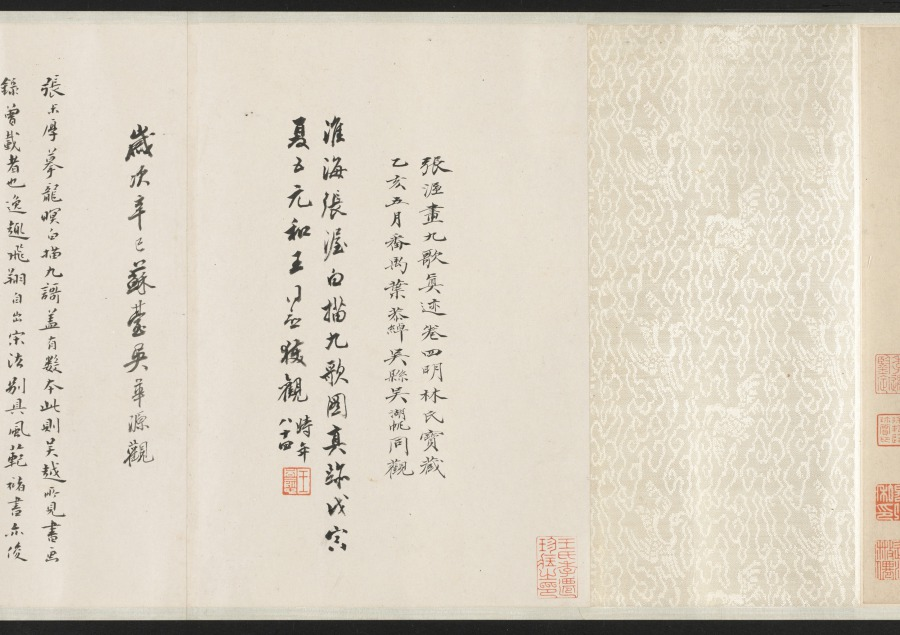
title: Nine Songs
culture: China, Yuan dynasty (1271-1368)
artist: Zhang Wo (Chinese, active c.1336–after 1364)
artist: Chu Huan (Chinese, active 1361)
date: 1361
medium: handscroll; ink on paper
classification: Painting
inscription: 7 colophons and 47 seals: 1 colophon, dated 1361, and 28 seals of Chu Huan 褚奐 (active c. 1361); 1 colophon, dated 1785, and 1 seal of Lu Shihua 陸時化 (1714-1779); 2 seals of Lu Yü-ch'ing (18th c.); 1 colophon, dated 1935, of Ye Gongchuo 葉恭綽 (1881-1968); 1 colophon, dated 1935, of Wu Hufan 吳湖帆(1894–1968); 1 colophon, dated 1938, and 1 seal of Wang Tongyu 王同愈 (1856-1941); 1 colophon, dated 1941, of Wu Huayuan 吳華源 (1893-1972); 1 colophon, dated 1942, and 9 seals of Xu Bangda 徐邦達 (1911–2012); 1 colophon, dated 1942, of Lang Jingshan 郎靜山 (1892-1995); 1 colophon, dated 1944, of Tang Yun 唐雲 (1910-1993); 6 seals of Wang Jiqian [C.C. Wang] 王季遷 (1907–2003).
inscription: Text of The Nine Songs written by Chu Huan at the end of each section.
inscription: 右離騷九歌圖，宋龍溟居士李公本，淮南張渥叔厚所畫妙絕當世。家藏請予書其辭目識于左。至正二十一年辛醜三月旦河南褚奐記。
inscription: Colophon by Lu Shihua 陸時化 (1714–1789): This scroll is fortunate to have been handed down from collections of the right people. Now, after 500 years, its condition is as good as when it was painted. I acquired this from Mr. Shen Guiyu [1673-1769], the President of the Board of Rites. The label is in his handwriting when he was 95 years old. I submit that Chu Huan (t. Shiwen) of the Yuan Dynasty was a native of Qiantang. His "seal" and li writings are in the style of Wu Rui. For example, in [Chu Kuei's] Ming ji lu [A list of masterpieces] is recorded the stele commemorating the restoration of the prefectural school of Kun-shan, the text of which was composed by Yang Weizhen in the twenty-first year of Zhizheng [1361]; and the calligraphy as well as the title in li style was by Chu Huan, who was at that time an assistant judge of the prefecture of Haining in the circuit of Hangzhou. Zhang Wo's zi is Shuhou (叔厚). His literary name is Zhen Qisheng (贞期生). According to [Gu Ying's] Yu shan cao tang ya jii, he liked to paint in the bai-miao or the "pure delineation" style after the method of Li Longmian [Li Gonglin 李公麟], which finds no peer among the ancient masters. This is agreed upon [by Pei Ch'iung] in his Qing jiang zhi who praised [Zhang Wo] as being quite learned and well-versed in many branches of the arts, especially figure painting. Recorded by Lu Shihua [The mountain dweller], listening to the pine, in the twelfth month of the yisi year [1785].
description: Painted in the baimiao, or fine-line drawing style, this ancient work demonstrates the literati’s use of abstract calligraphic brushwork for self-expression. The subject of the “Nine Songs”—songs associated with shamanistic rituals in the ancient Chu kingdom—had traditionally provided artists with myths and legends that they could explore and reinterpret in their own works.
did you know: Divided into eleven sections, the scroll contains illustrations by painter Zhang Wu followed by a transcription of the relevant verse by calligrapher Chu Huan.